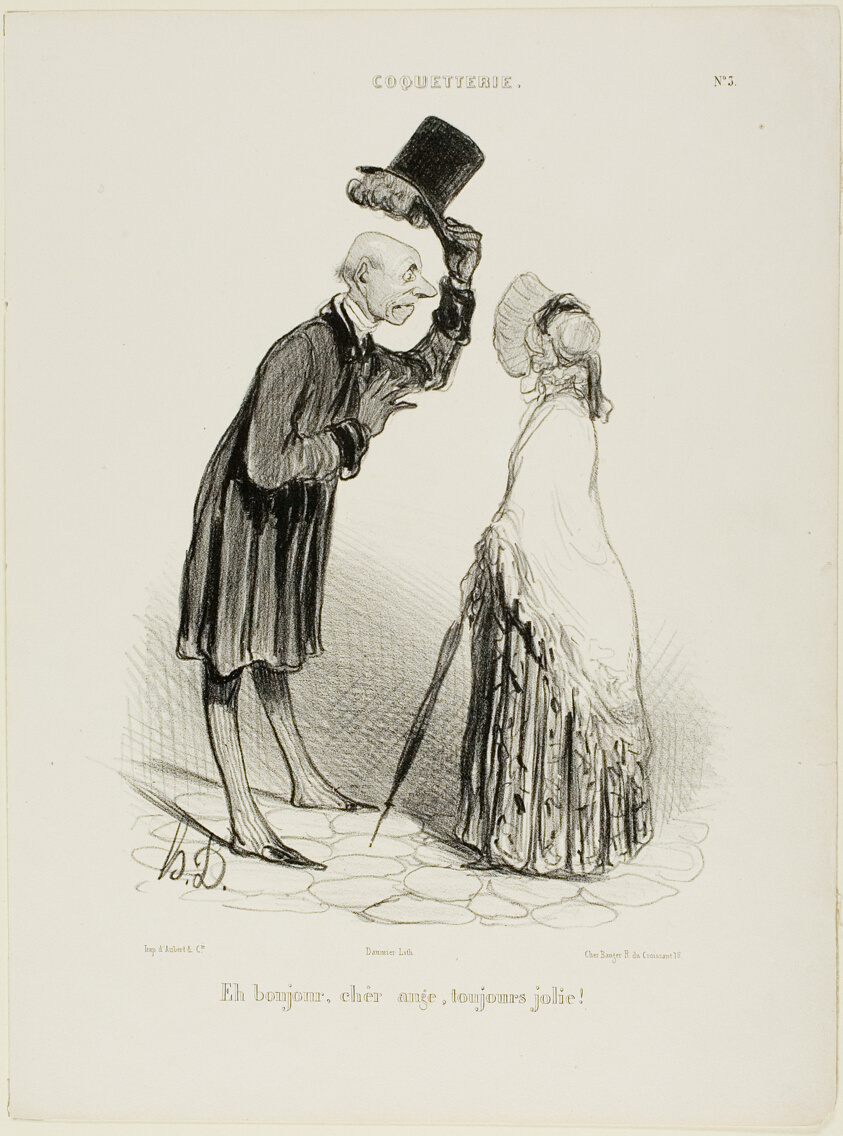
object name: Print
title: “Hello, Angel, always pretty...,” plate 3 from Coquetterie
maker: Honoré Victorin Daumier; French, 1808-1879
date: 1839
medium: Lithograph in black on white wove paper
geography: France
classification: lithograph; print; prints and drawing